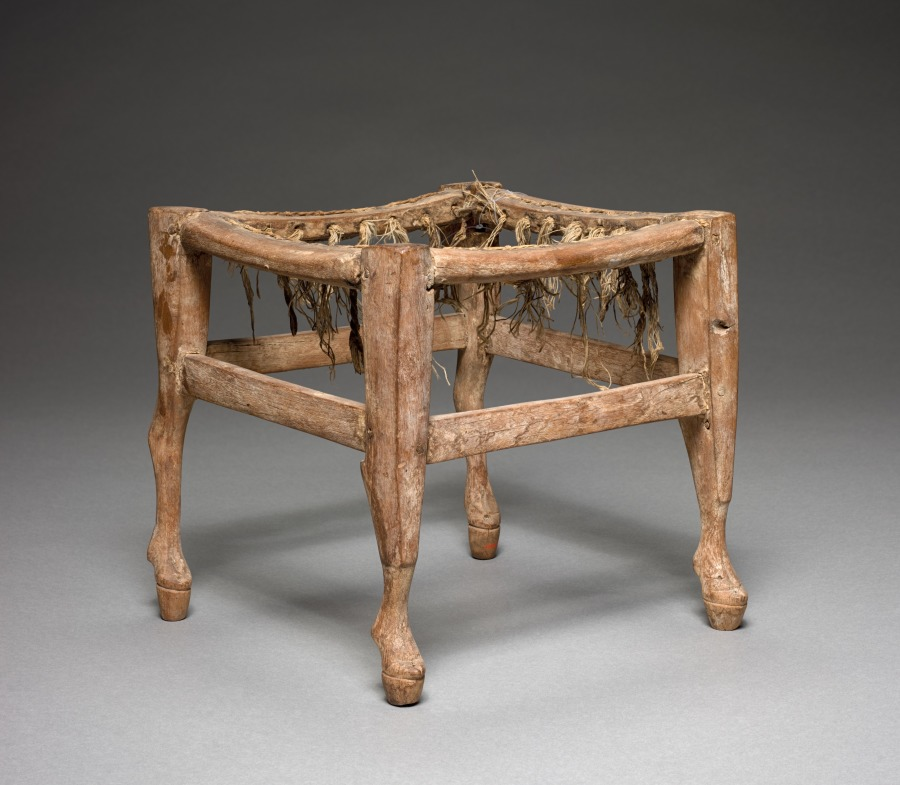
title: Child's Stool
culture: Egypt, New Kingdom (1540–1069 BCE), Dynasty 19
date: 1295–1188 BCE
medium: wood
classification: Funerary Equipment